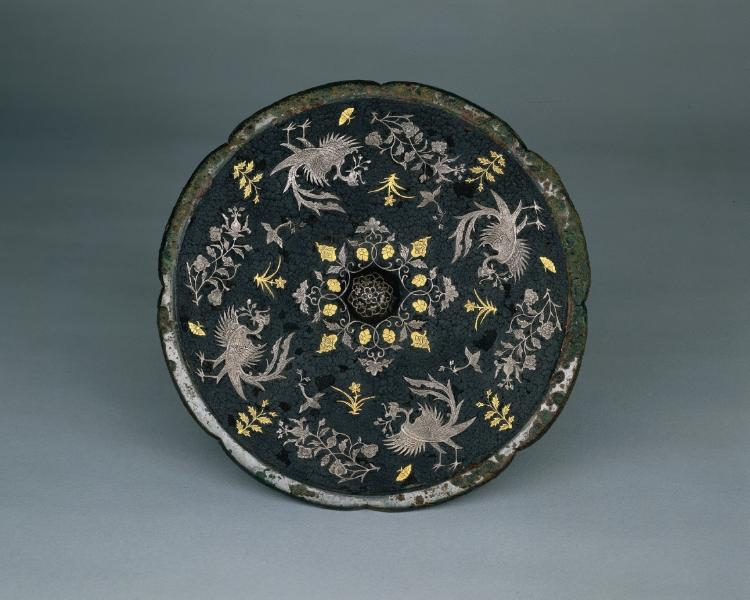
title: Mirror with Phoenixes, Birds, Butterflies, and Floral Sprays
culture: China, Tang dynasty (618-907)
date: 700s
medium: bronze with silver and gold inlaid lacquer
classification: Metalwork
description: This extremely rare pingtuo mirror is coated with a lacquer base inlaid with paper-thin sheets of silver and gold. The decorative patterns, especially the floral arabesques and the phoenixes and birds holding branches in their mouths, have a pronounced Persian and Central Asian flavor. Luxury items like this had been used by the Tang emperor as diplomatic gifts. A similar example from the Japanese imperial collection of Emperor Shōmu was donated by Empress Kōmyō in 756 to the Shōsō-in repository of the Tōdai-ji Temple, Nara, Japan.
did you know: Mirrors like this have a polished side for viewing and a decorated side with a central knob for lifting.